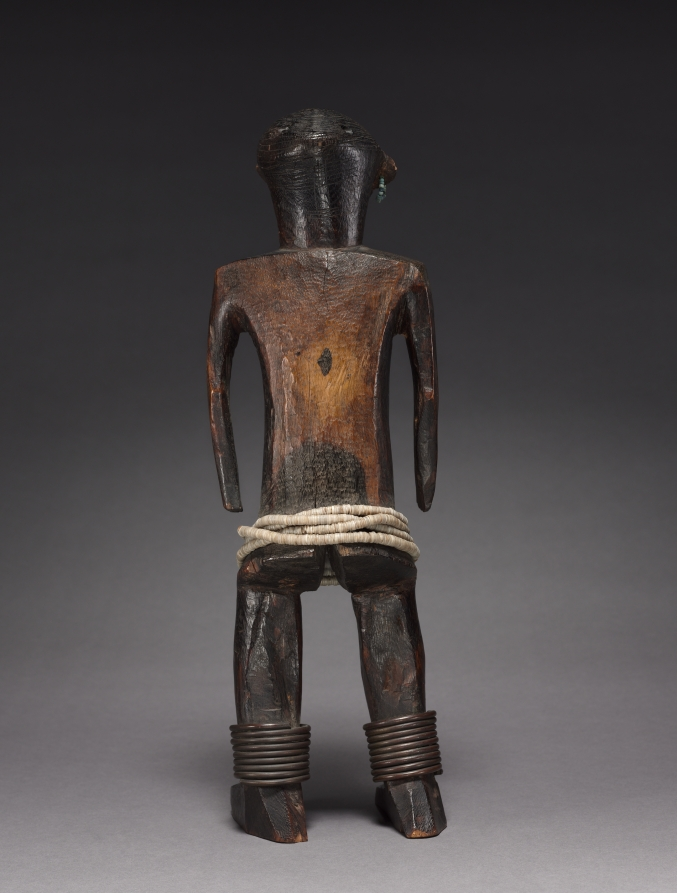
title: Female Figure of a Pair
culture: Africa, Central Africa, Democratic Republic of Congo, probably Ngbandi-style carver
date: late 1800s-early 1900s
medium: Wood, iron alloy, glass beads, plant fiber, and cloth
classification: Sculpture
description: Carving of paired figures is quite well documented among the Ngbandi and its neighbors the Ngbaka-Minagende, where such sculptures are said to represent the mythical ancestor Seto and his sister-wife, Nabo. Field-based research cannot confirm the existence of figurative couples among the Ngbandi.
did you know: Odette Delenne, the collector of this pair, said that these figures reminded her of herself and her husband, René.